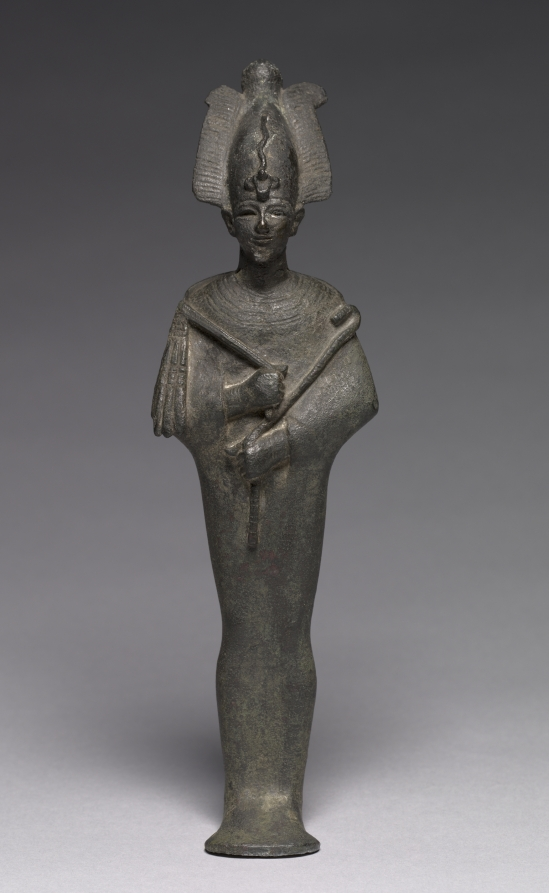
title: Statuette of Osiris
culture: Egypt, Late period (715–332 BCE), Dynasty 26 or later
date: 664–30 BCE OR 664–330 BCE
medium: bronze, body solid cast, head hollow cast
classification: Sculpture